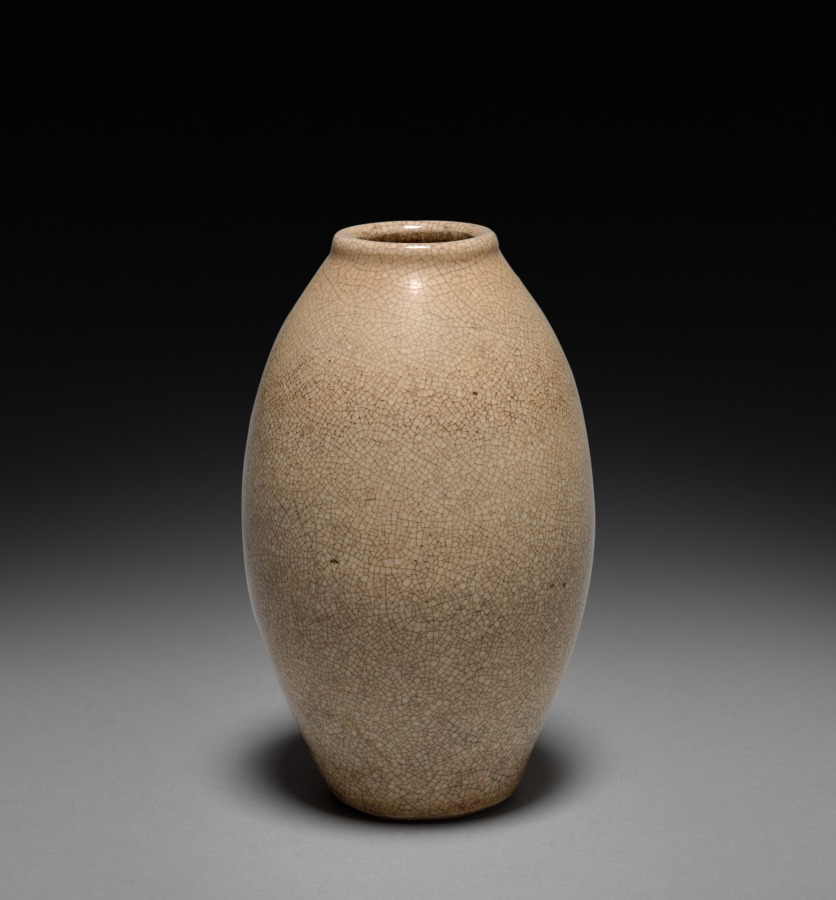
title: Vase: Dhong-ke Ware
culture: China, Ming dynasty (1368–1644)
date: 1368–1644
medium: white crackled stoneware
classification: Ceramic